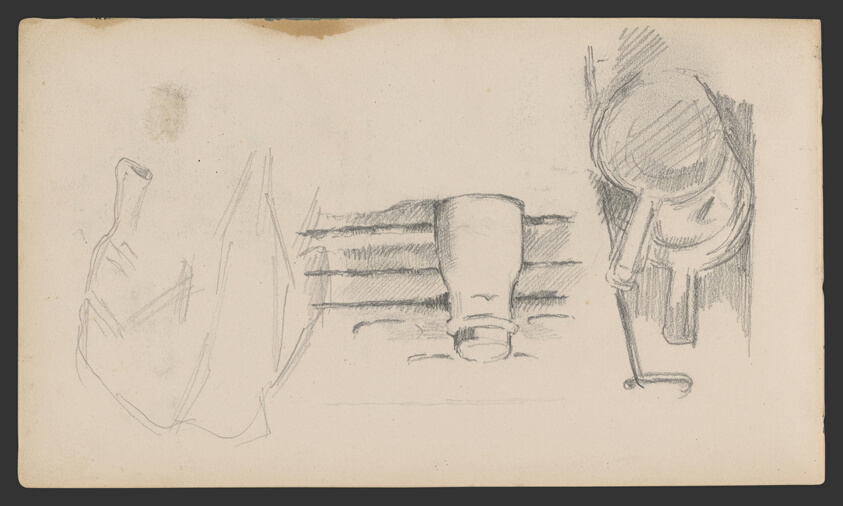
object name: Drawing and Watercolor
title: Sketchbook No. 2 (L'Estaque)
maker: Paul Cézanne; French, 1839-1906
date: 1875–86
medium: Graphite and pen and ink drawings on paper, bound into a book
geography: France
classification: sketchbook; graphite; prints and drawing; paper